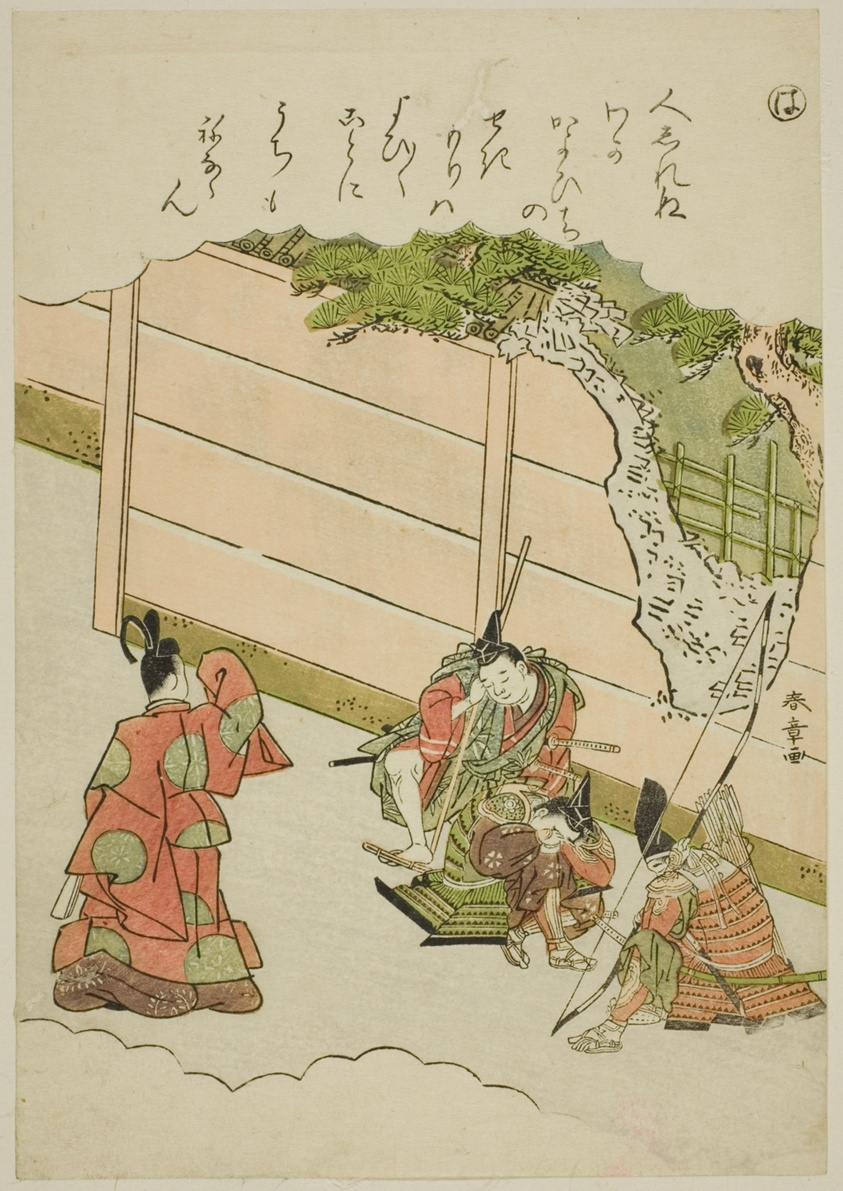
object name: Print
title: "Ha": Guards at the "Love Passage," from the series "Tales of Ise in Fashionable Brocade Pictures (Furyu nishiki-e Ise monogatari)"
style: Japanese (culture or style)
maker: Katsukawa Shunsho 勝川 春章; Japanese, 1726-1792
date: c. 1772/73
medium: Color woodblock print; koban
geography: Japan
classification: woodblock print; print; asian art